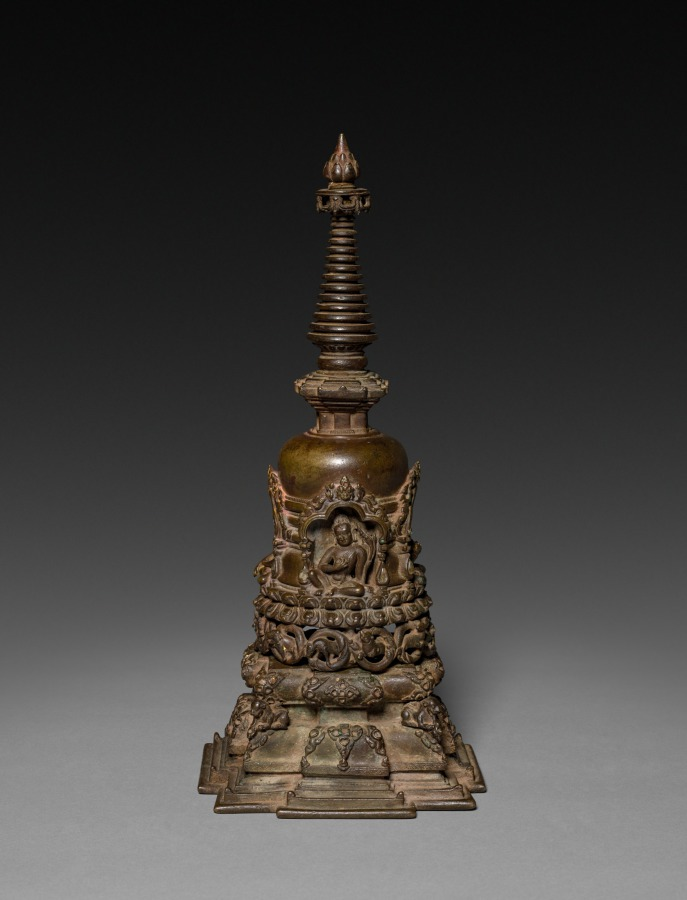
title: Miniature Votive Stupa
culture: Eastern India, Bihar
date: c. 1000s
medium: bronze with inlay of semiprecious stones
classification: Sculpture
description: Small-scale stupas were modeled on large monuments that contain relics of the Buddha or revered members of the Buddhist community within the solid, dome segment. Such models were made to commemorate a devotional visit to the monument. Four different sacred Buddhist images face each of the four directions: Shakyamuni, Vajrasattva, Maitreya, and Prajnaparamita.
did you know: The spire consists of thirteen disk-like parasols that refer to the thirteen stages on the path to enlightenment.